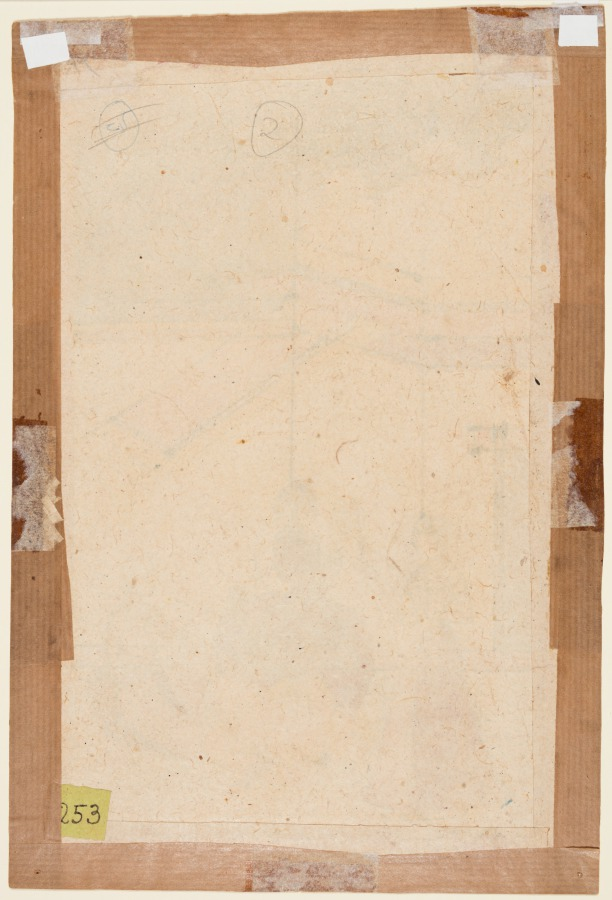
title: Krishna Under a Canopy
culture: Northwestern India, Rajasthan, Rajput Kingdom of Raghogarh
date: c. 1680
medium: Gum tempera and gold on paper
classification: Painting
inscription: 2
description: This tranquil, languid scene on a white marble, carpeted terrace depicts the god Krishna in the place of an earthly prince. A female attendant at the left fans him, while he and another lady each hold a rose. The open doorway in the background with the rolled-up curtain above suggests the intimacy of an imminent encounter inside.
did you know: Krishna holds a scepter, or mace, which is one of the weapons of the god Vishnu, of whom he is an incarnation.